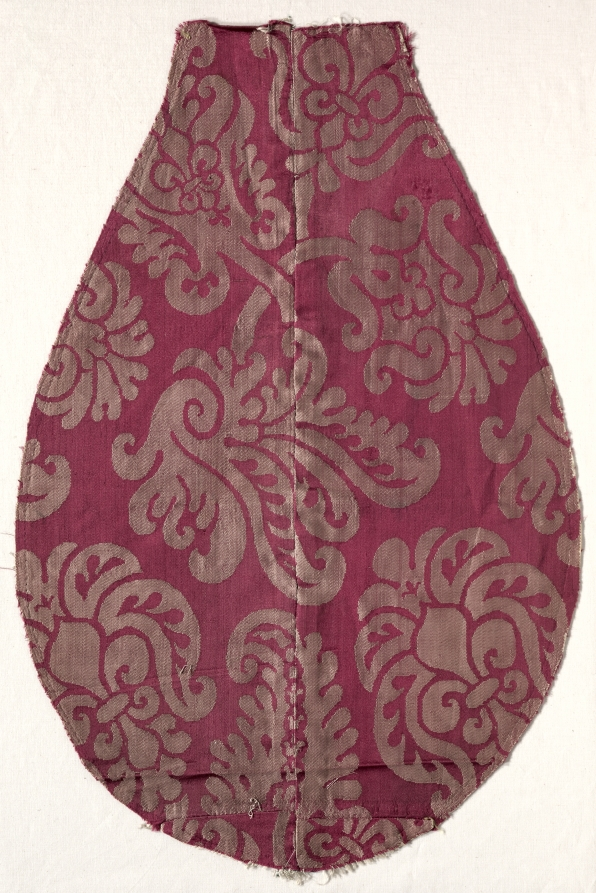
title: Fragment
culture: France or Spain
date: early 1600s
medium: silk damask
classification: Textile